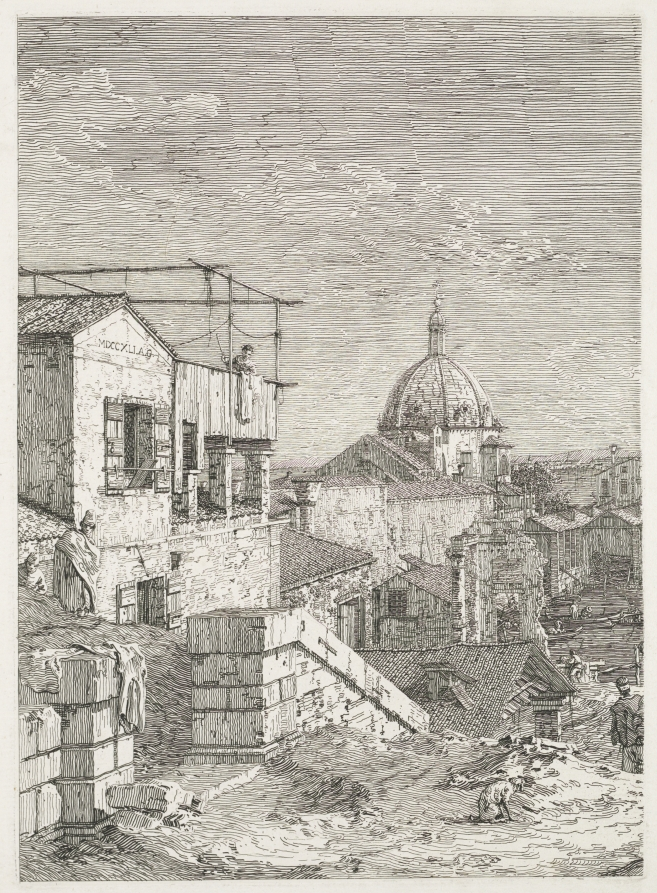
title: Views: La Maison a l'inscription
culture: Italy, Venice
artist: Antonio Canaletto (Italian, 1697–1768)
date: 1735–1746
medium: etching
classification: Print